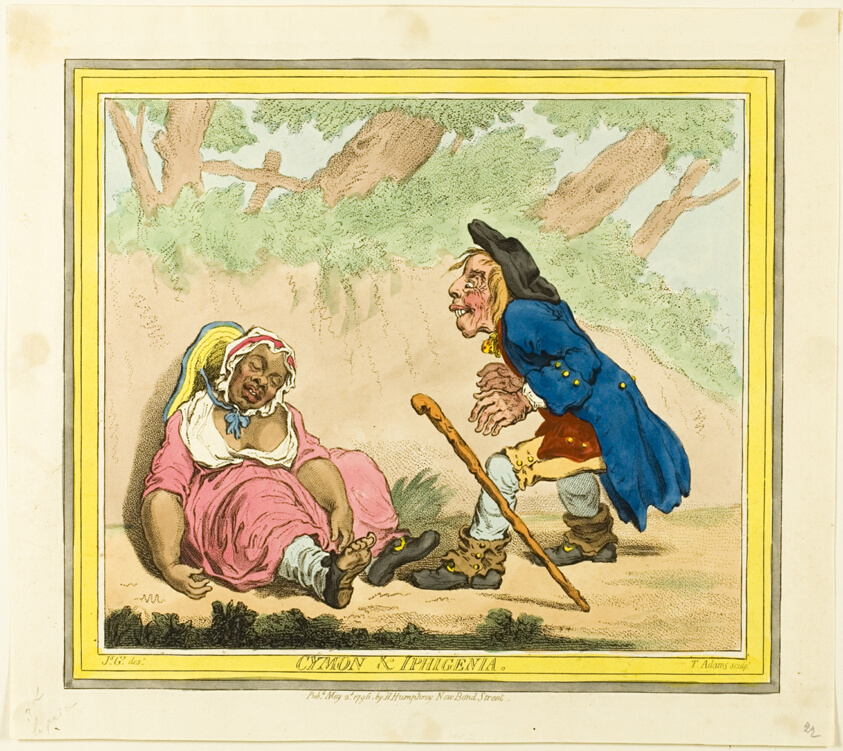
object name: Print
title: Cymon and Iphigenia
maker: James Gillray (English, 1756-1815); published by Hannah Humphrey (English, c. 1745-1818)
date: published May 2, 1796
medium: Etching in dark brown, with handcoloring and stipling, on cream wove paper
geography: England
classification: etching; print; prints and drawing